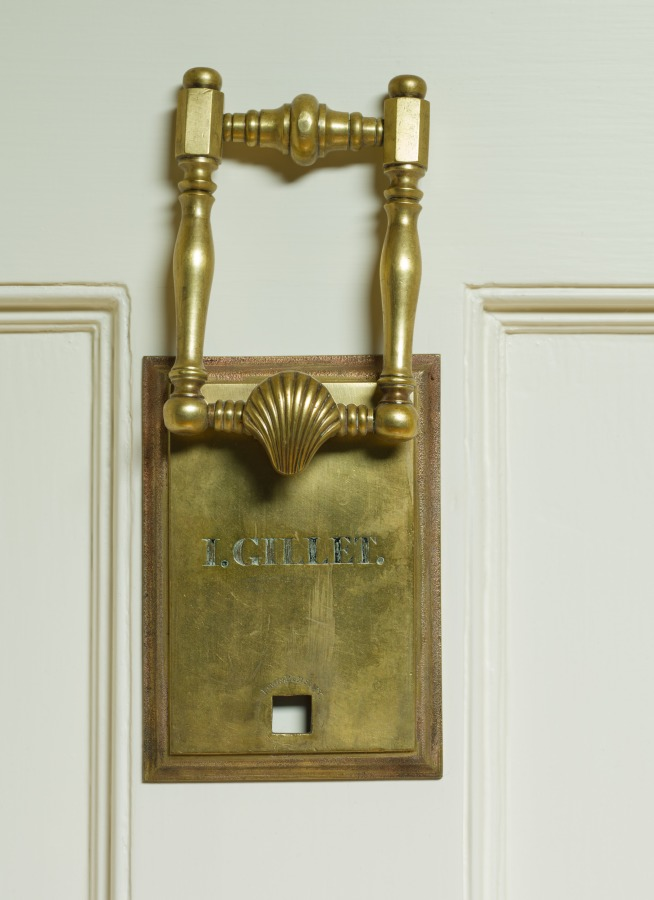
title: Door Knocker from the Isaac Gillet House, Painesville, Ohio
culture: America, Ohio, Painesville, 19th century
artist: Jonathan Goldsmith (American, 1783–1847)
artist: and Lewis Firm (American)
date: c. 1840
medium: brass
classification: Metalwork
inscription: engraved: "I. Gillet"; inscribed: "Lewis, Wall St. N.Y."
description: This elaborate doorway originally came from a house designed and built by Jonathan Goldsmith, one of the most celebrated early architects of Northeastern Ohio. Goldsmith, who was born in Connecticut and trained in Massachusetts, came to the area around 1802 and brought with him a knowledge of the prevailing classical styles in architecture and decoration. This doorway formed the most decorative element of the front of the Isaac Gillet House and features elements of both Greek (boldly carved acanthus leaves and swags) and Roman (tall, thin columns and flat window tracery) architecture.